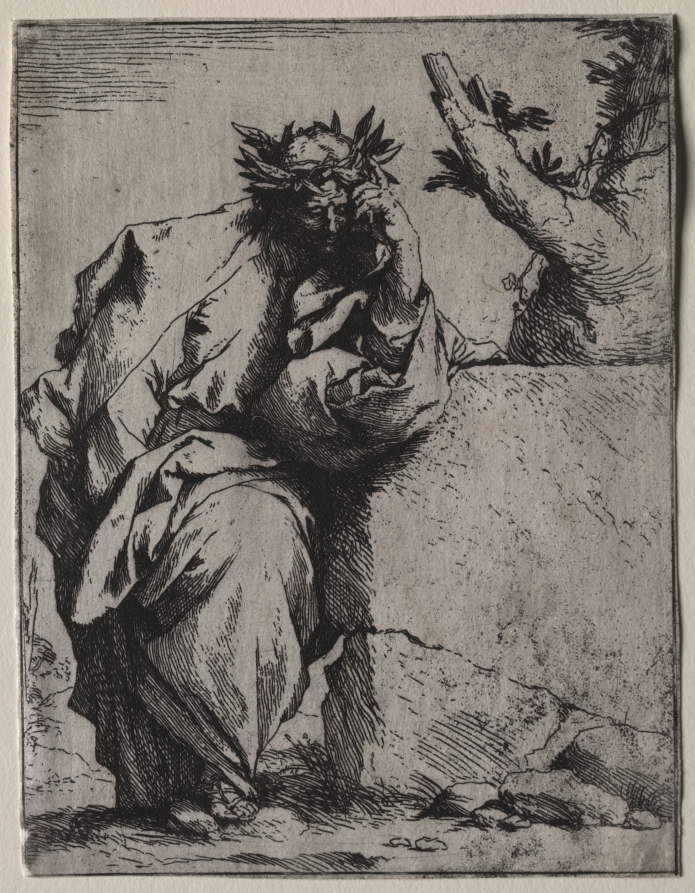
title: Virgil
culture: Spain, worked in Naples, Italy, 17th century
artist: Jusepe de Ribera (Spanish, 1591–1652)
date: c. 1620–21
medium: etching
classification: Print